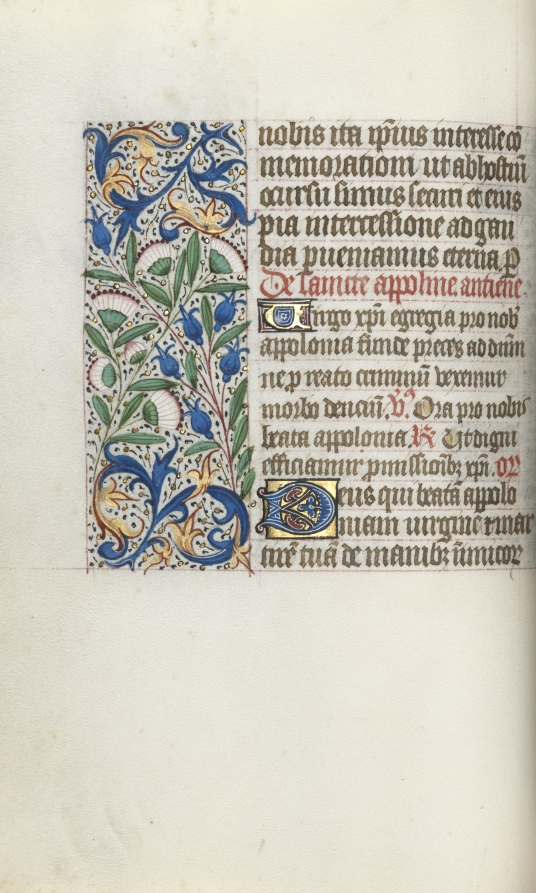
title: Book of Hours (Use of Rouen): fol. 54v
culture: France, Rouen, 15th century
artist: Master of the Geneva Latini (French, active Rouen, 1460–80)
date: c. 1470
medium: ink, tempera, and gold on vellum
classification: Bound Volume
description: In the late 1400s and early 1500s Rouen was an established and important center of book production. The city’s cathedral had a wealthy chapter that spent large sums of money to commission books and to maintain its extensive library. The stationers and booksellers would have likely been concentrated in or near the cathedral precinct. This artist, named after a manuscript now in Geneva, was Rouen’s principal illuminator during the second half of the 1400s.